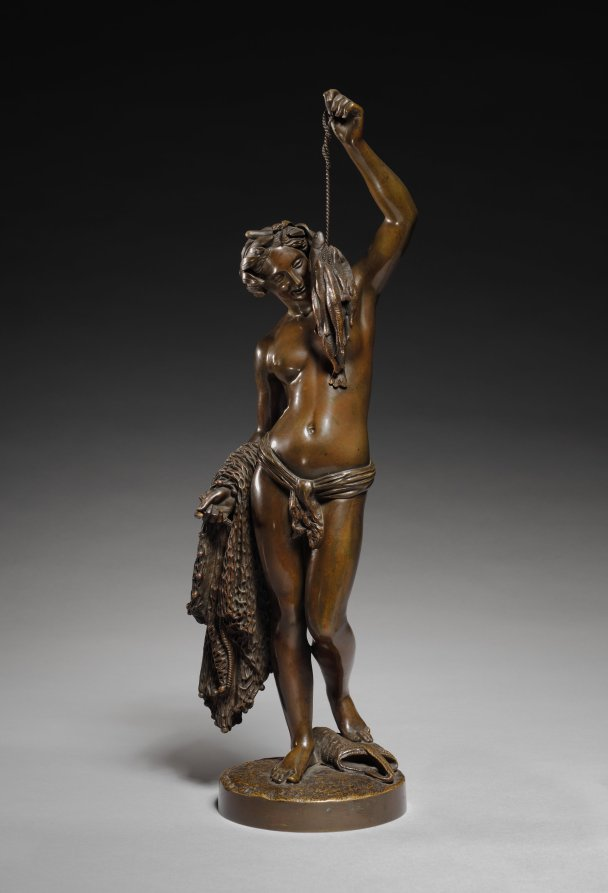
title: Allegory of Fishing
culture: France, 19th century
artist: James Pradier (Swiss, 1790–1852)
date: c. 1840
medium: bronze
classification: Sculpture